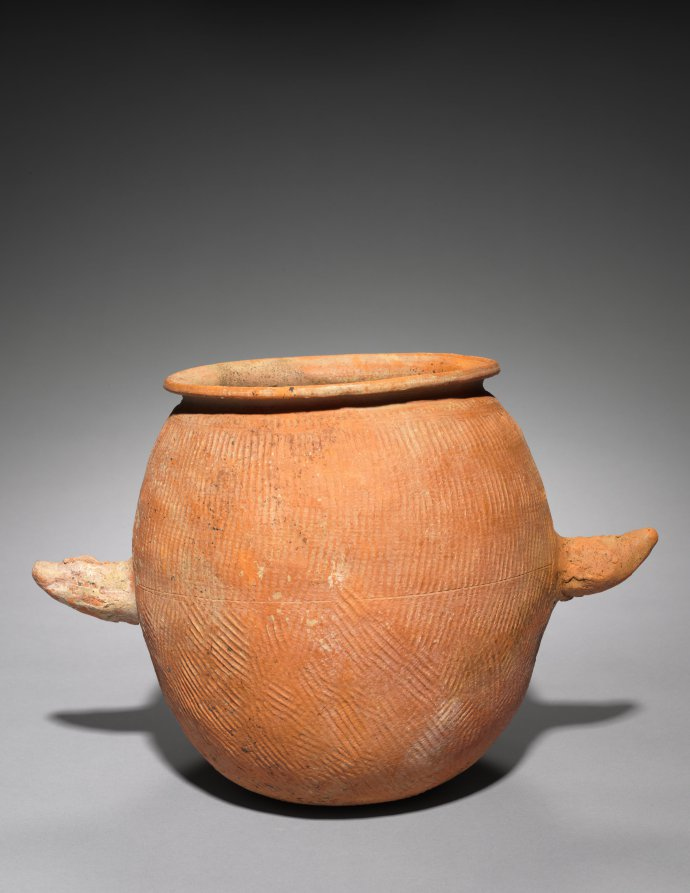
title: Jar with Horn-Shaped Handles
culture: Korea, Three Kingdoms period (57 BCE–668 CE)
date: 100s CE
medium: earthenware with impressed surface designs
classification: Ceramic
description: Although the function of this earthenware vessel remains unknown, its low-fired red surface indicates the various steps in its fabrication. First, coils of clay were layered on top of one another and pinched together to form the wall of the pot. Then wood mallets with carved surfaces pounded these walls simultaneously, inside and out, merging and thinning the clay bands. Thus the impressed designs visible on both the inner and outer surfaces were functional as well as decorative. A single incised line courses across the body wall of impressed patterns, linking the two "horns." Each of these is pierced to allow a uniform firing of the entire vessel. The function of the "horn" handles remains unknown. The smooth, finished surfaces of the short neck and thick, rounded mouth of the vessel indicate the use of a potter's wheel to complete the form. This rare vessel probably comes from the southwestern region of the Korean peninsula.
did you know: Closed kilns built on hillsides became widely used for producing this type of pottery vessel in Korea during the Three Kingdoms period.